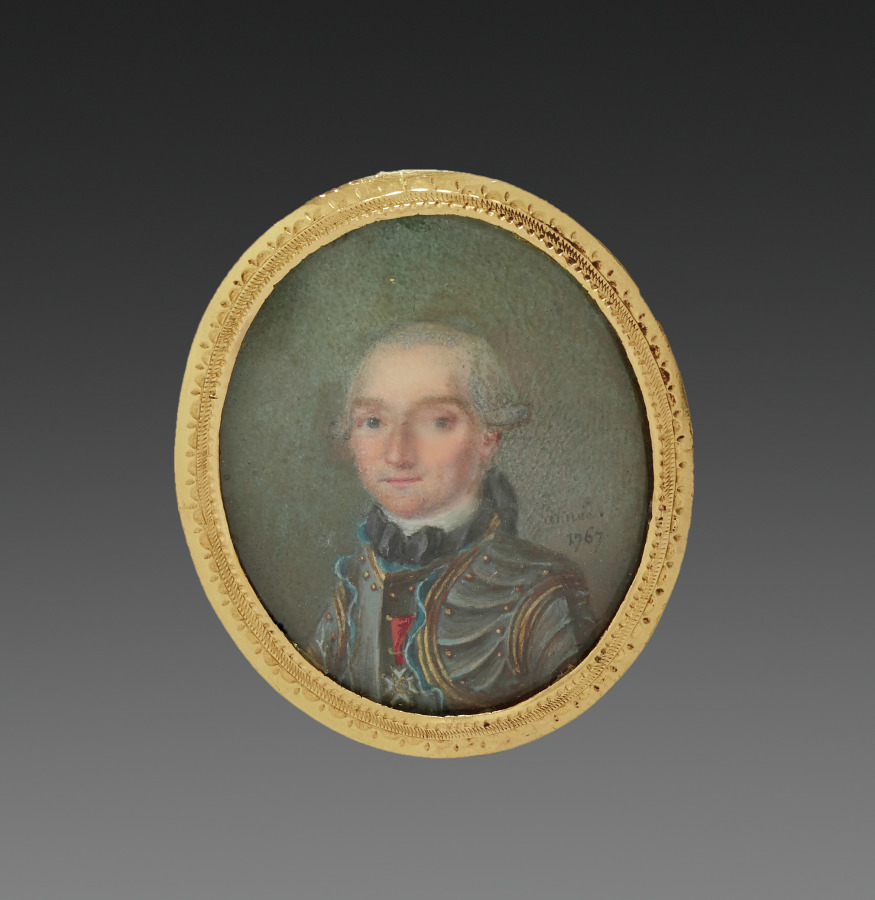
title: Portrait Miniature for a Round Box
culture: France, 18th century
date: c. 1770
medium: portrait miniature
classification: Miscellaneous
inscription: miniature inscribed: annee [?]/1767.